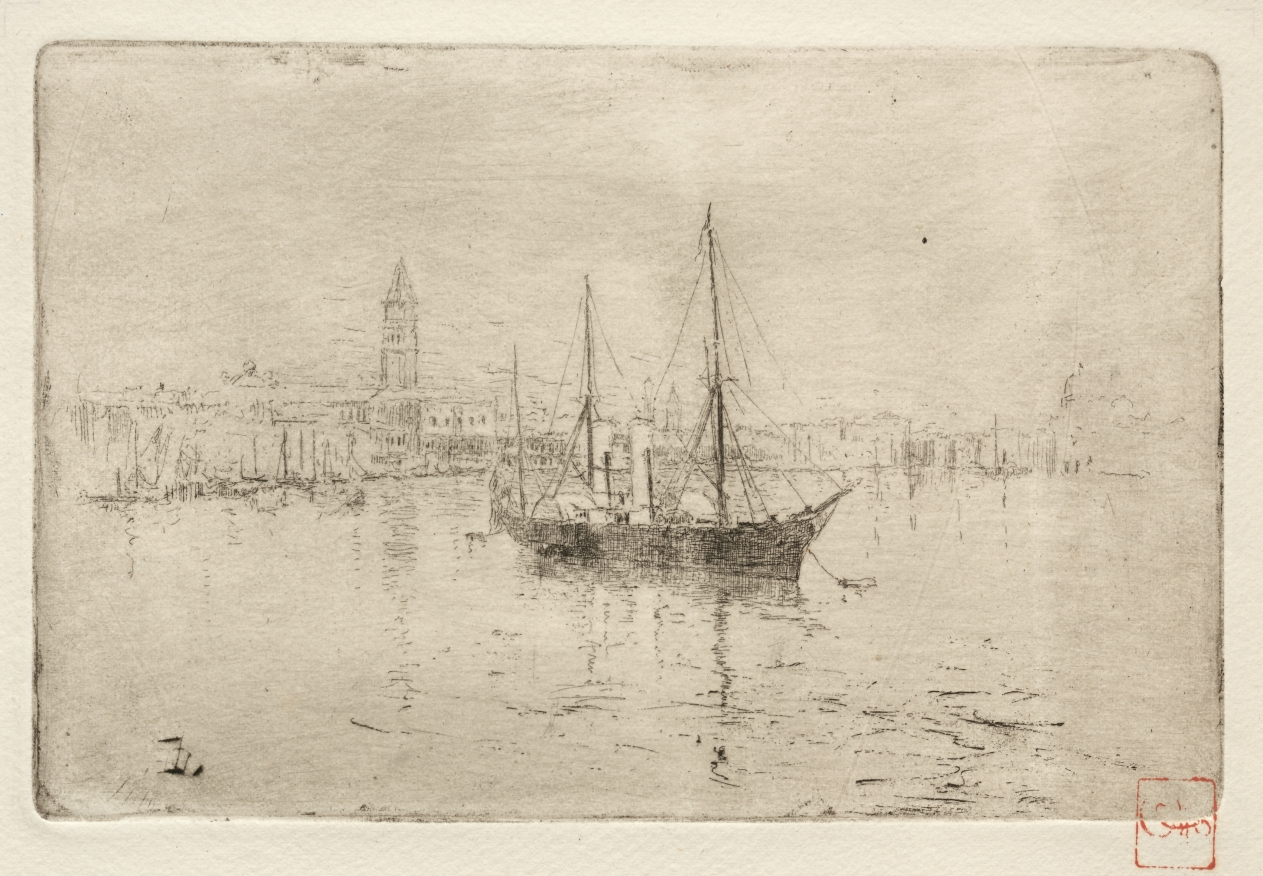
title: Grand Canal, Venice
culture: America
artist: Frank Duveneck (American, 1848–1919)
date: 1883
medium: etching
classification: Print